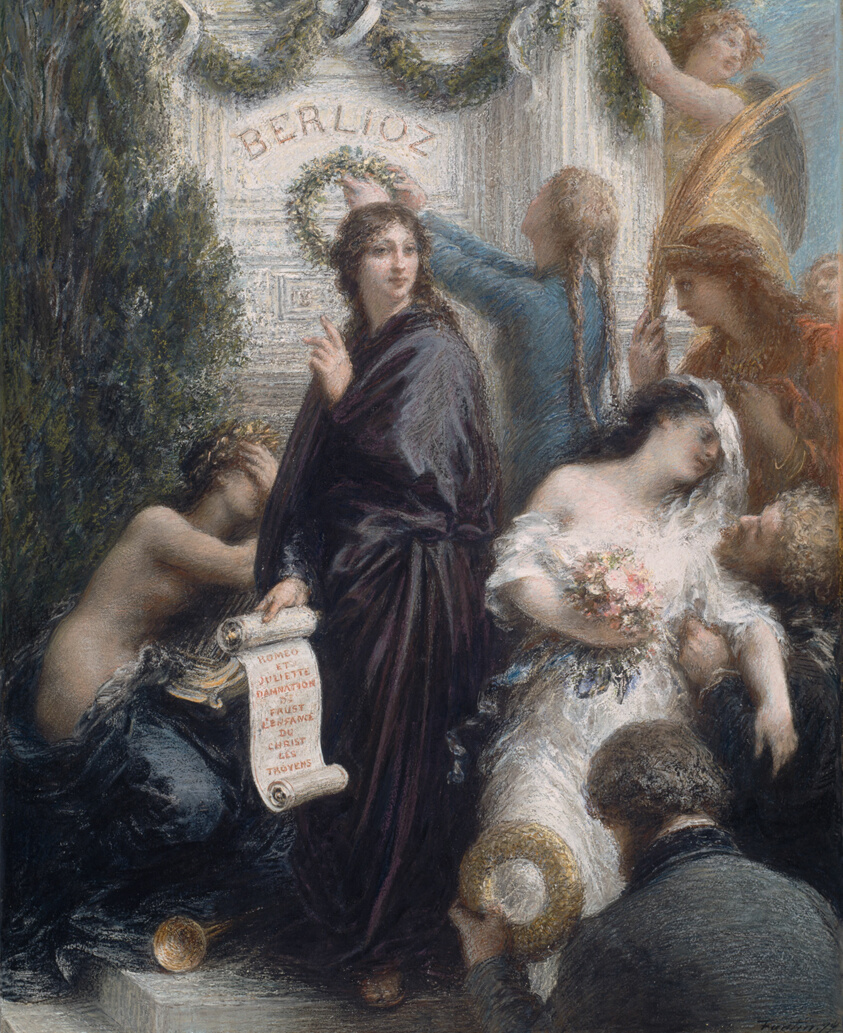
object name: Drawing and Watercolor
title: The Anniversary (Homage to Hector Berlioz)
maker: Henri Fantin-Latour (French, 1836-1904)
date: 1877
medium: Pastel, with opaque watercolor and scraping, over a lithograph in black ink on wove paper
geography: France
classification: pastel; drawings (visual works); prints and drawing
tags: men, people, prints and drawings, operas/operettas